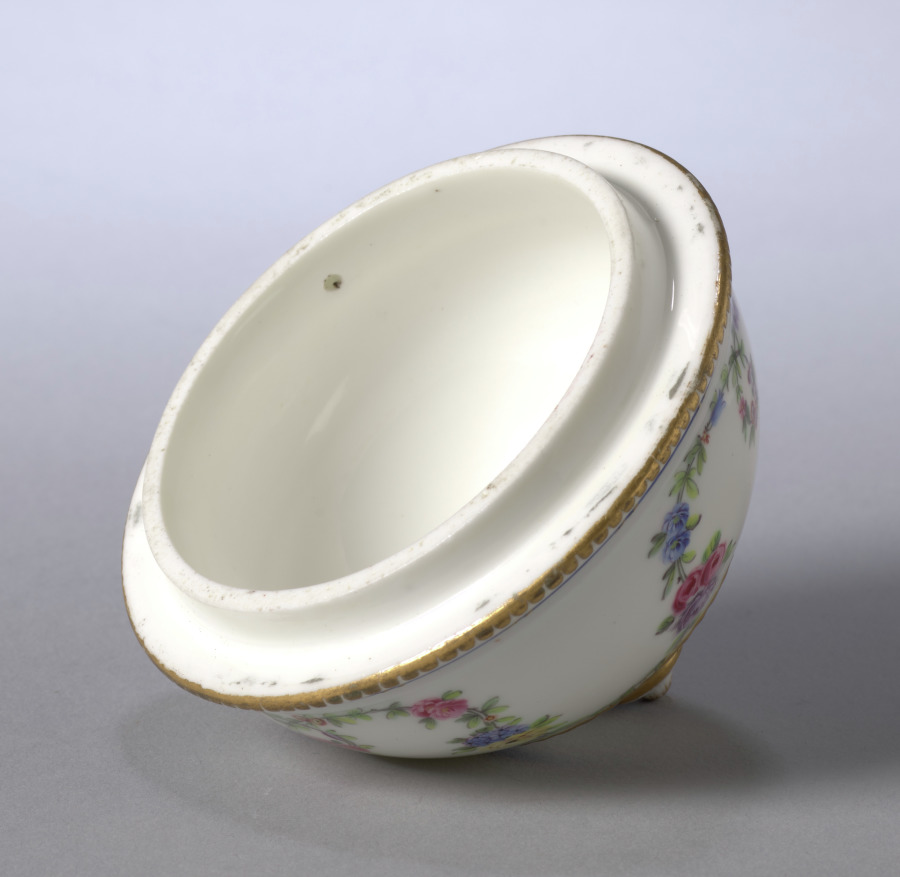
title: Soap Box (cover)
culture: France, Sèvres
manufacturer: Sèvres Porcelain Factory (French, est. 1756)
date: c. 1769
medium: soft-paste porcelain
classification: Ceramic